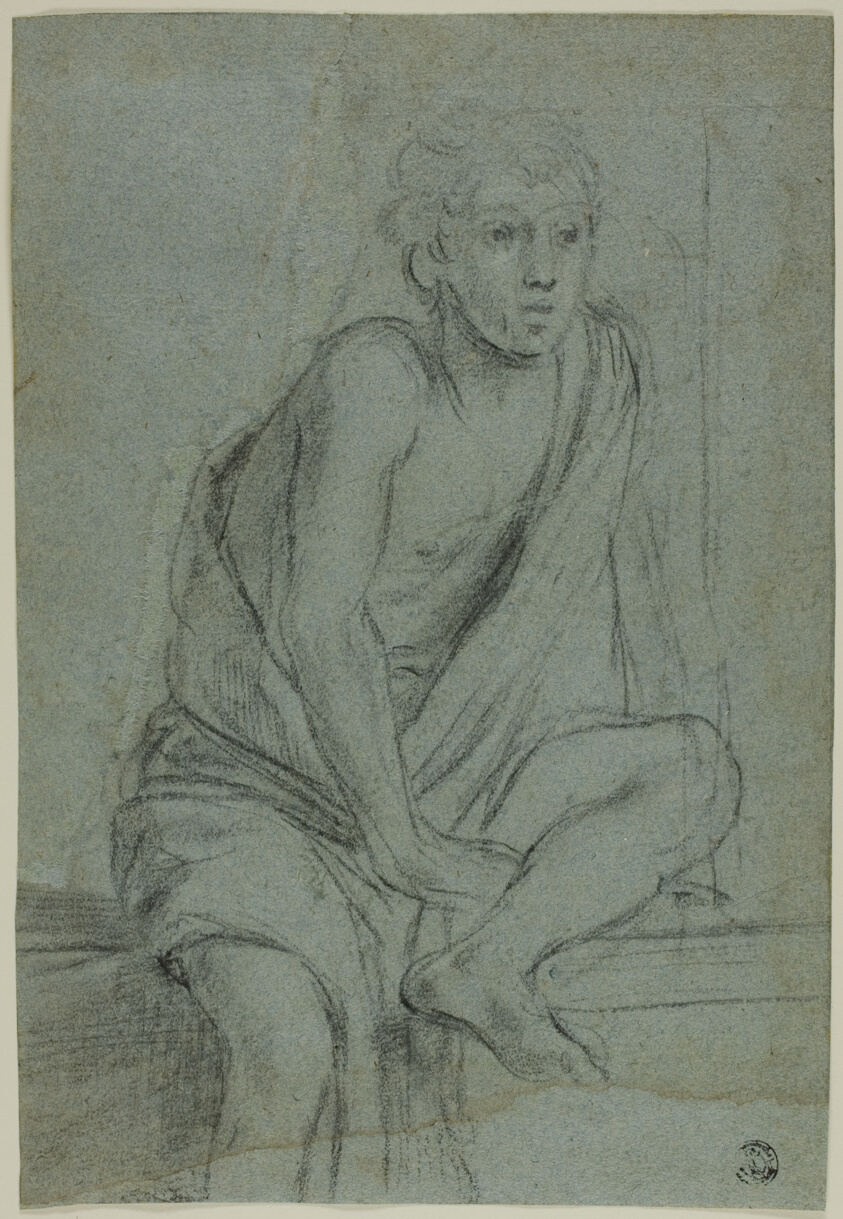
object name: Drawing and Watercolor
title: Seated Youth: Study for Flagellation of Saint Andrew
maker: Domenichino (Italian, 1581-1641)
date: c. 1608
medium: Charcoal on blue laid paper, laid down on cream laid card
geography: Italy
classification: drawings (visual works); prints and drawing